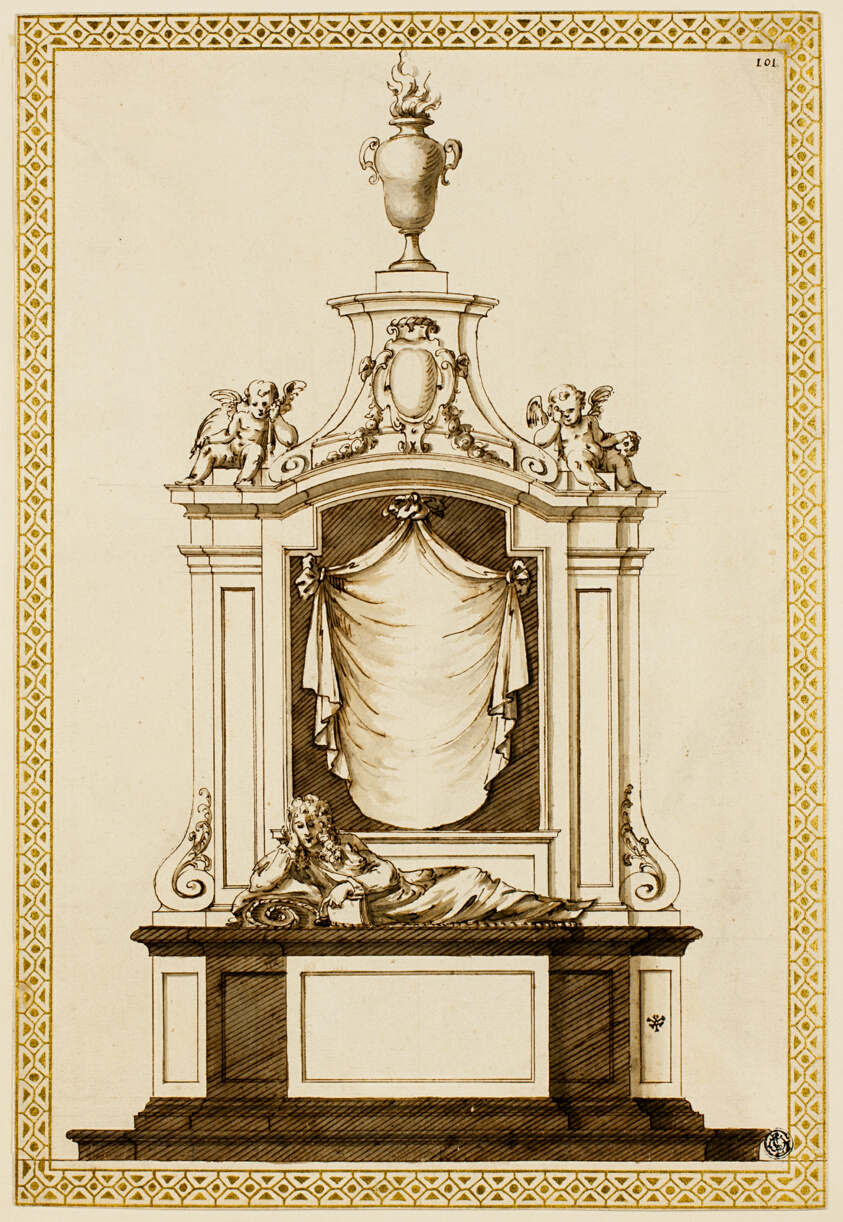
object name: Drawing and Watercolor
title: Project for a Monument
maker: Edward Pierce, the younger (English, c. 1630-1695); or Inigo Jones (English, 1573-1652)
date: c. 1695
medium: Pen and brown ink, with brush and gray and brown wash, over traces of graphite, with gold paint in borders on ivory laid paper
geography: England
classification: pen and ink drawings; drawings (visual works); prints and drawing